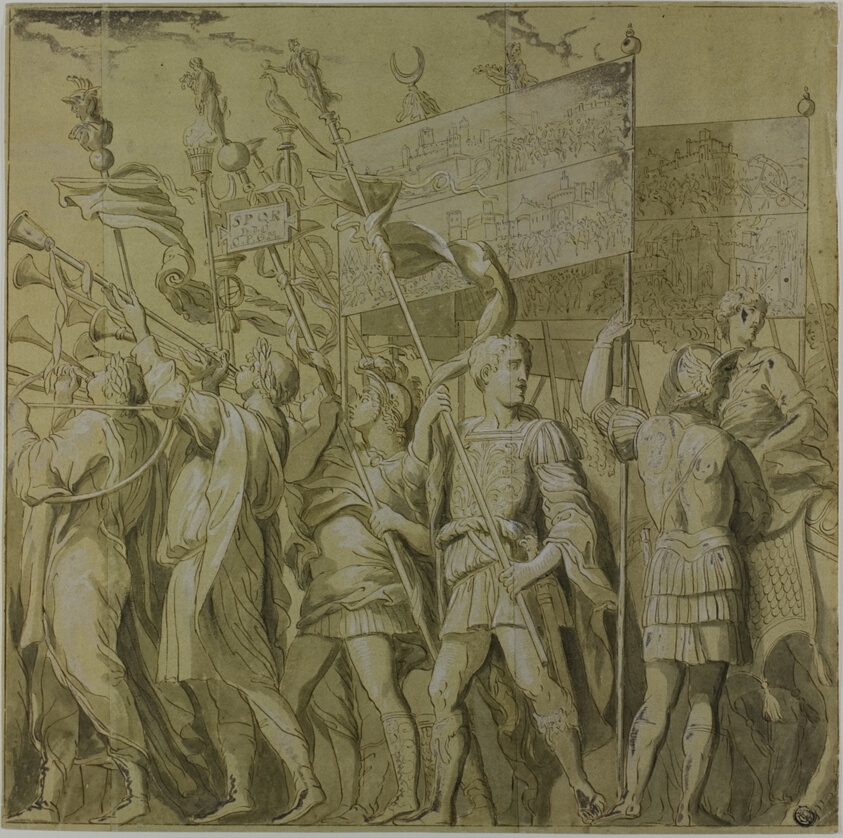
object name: Drawing and Watercolor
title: Triumphs of Julius Caesar: Canvas No. I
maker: After Andrea Mantegna; Italian, 1431-1506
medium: Pen and brown ink, with brush and gray wash, heightened with lead white (oxidized), on cream laid paper, pieced and prepared with yellow wash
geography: Italy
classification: pen and ink drawings; drawings (visual works); prints and drawing